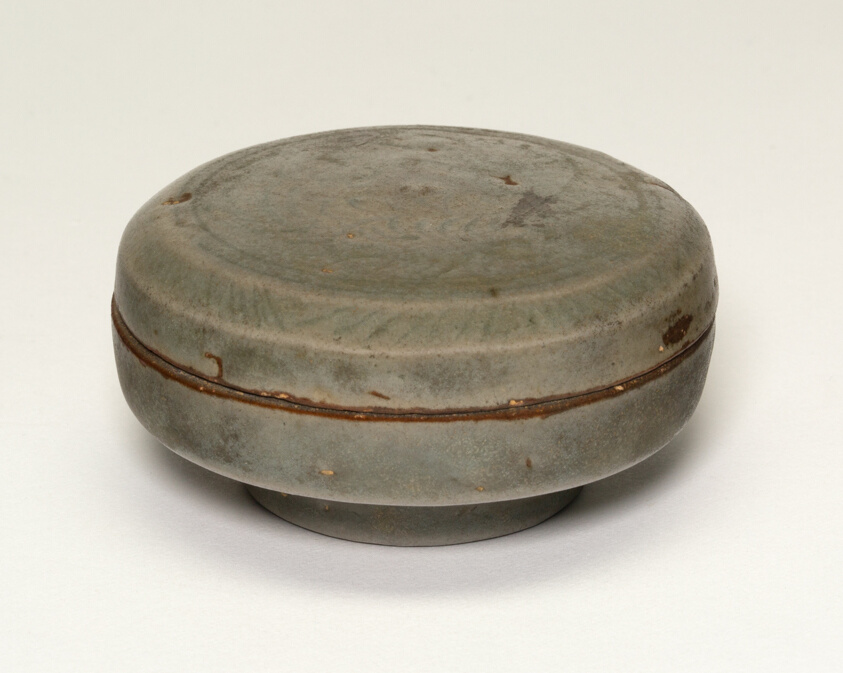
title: Covered Cosmetic Box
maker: Korea or China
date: Goryeo dynasty (918–1392)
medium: Celadon-glazed stoneware with underglaze incised decoration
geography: China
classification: ceramics; asian art